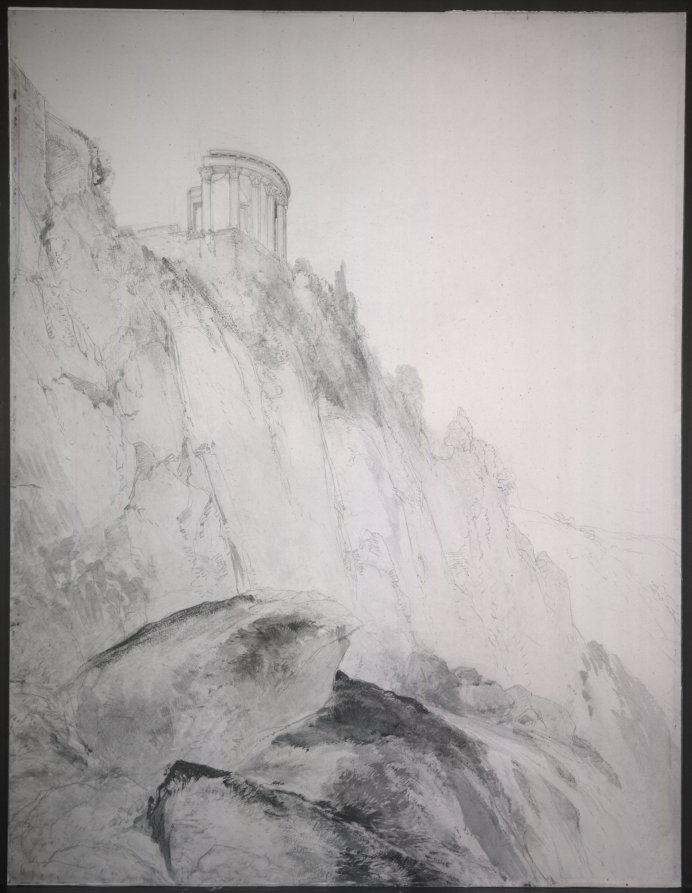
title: The Temple of Vesta and the Falls at Tivoli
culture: England, 19th century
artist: William Callow (British, 1812–1908)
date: 1859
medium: watercolor with gouache and graphite underdrawing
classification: Drawing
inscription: Signed and dated, at lower left, in dark brown wash: William Callow / 1859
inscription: inscribed on backing board (in a modern hand): No. 3 / Temple of Vesta / Tivoli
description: A meticulously finished, grand-scale presentation watercolor, this drawing was exhibited in 1859 at the Society of Painters in Water Colours in London. The view was taken from a low vantage point, foregrounding closely observed, moss-covered rocks amid the frothy cascade. Jewel-like, the Temple of Vesta surmounts the imposing cliff, gleaming white against a crisp, blue sky. The majesty of the view is underscored by the presence of nearly imperceptible figures in the far distance hanging linens to dry along the temple wall.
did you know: William Callow likely based the view seen in this drawing on sketches made during his first trip to Italy in 1840.